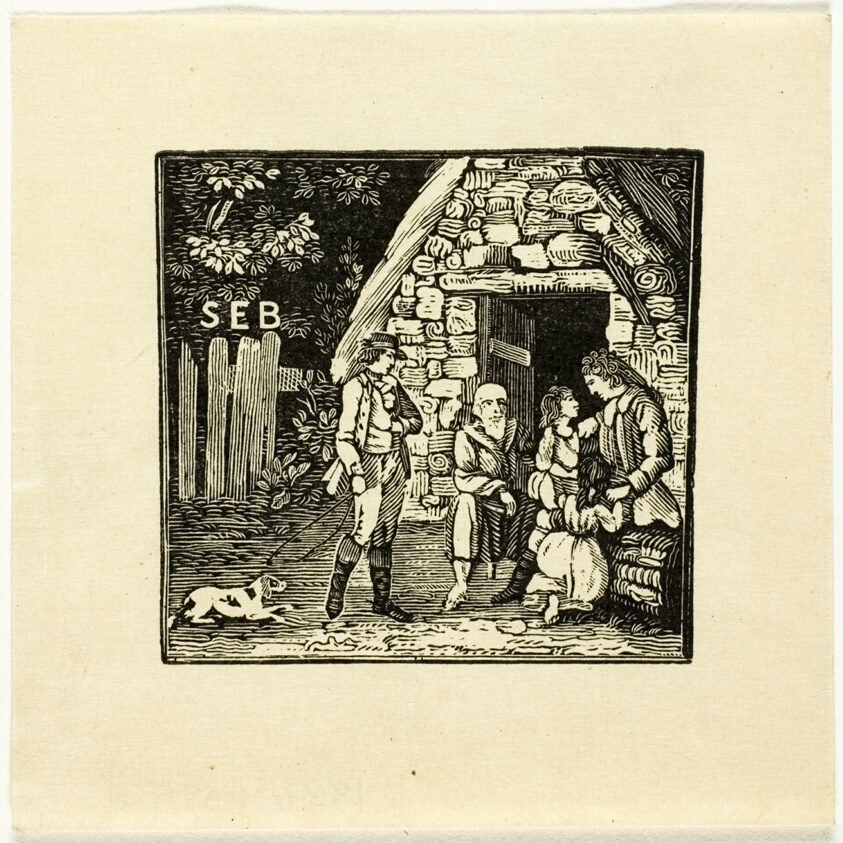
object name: Print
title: Book Illustration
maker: Thomas Bewick (English, 1753-1828)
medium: Wood engraving on paper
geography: England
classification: wood engraving; print; prints and drawing